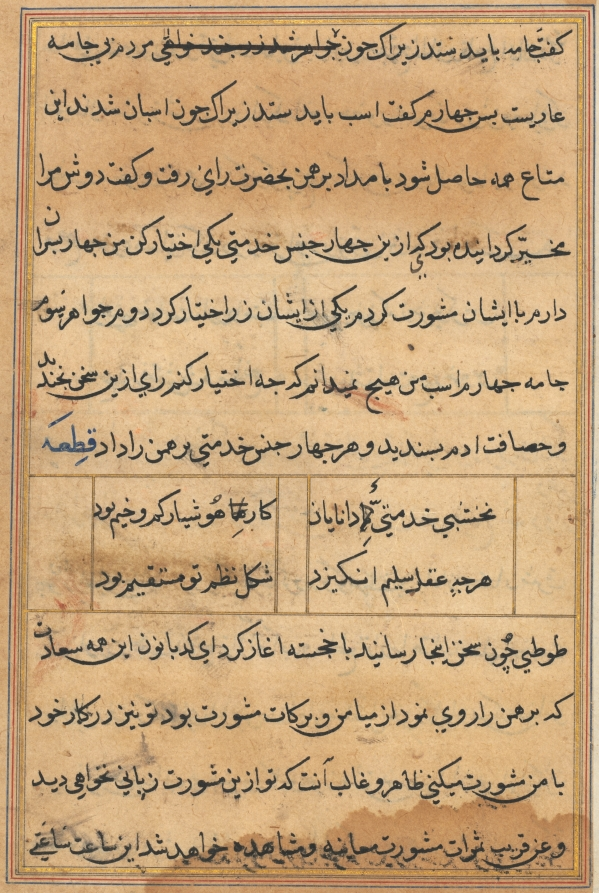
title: Tuti-Nama (Tales of a Parrot)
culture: Mughal India, court of Akbar (reigned 1556–1605)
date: c. 1560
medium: gum tempera, ink, and gold on paper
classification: Painting